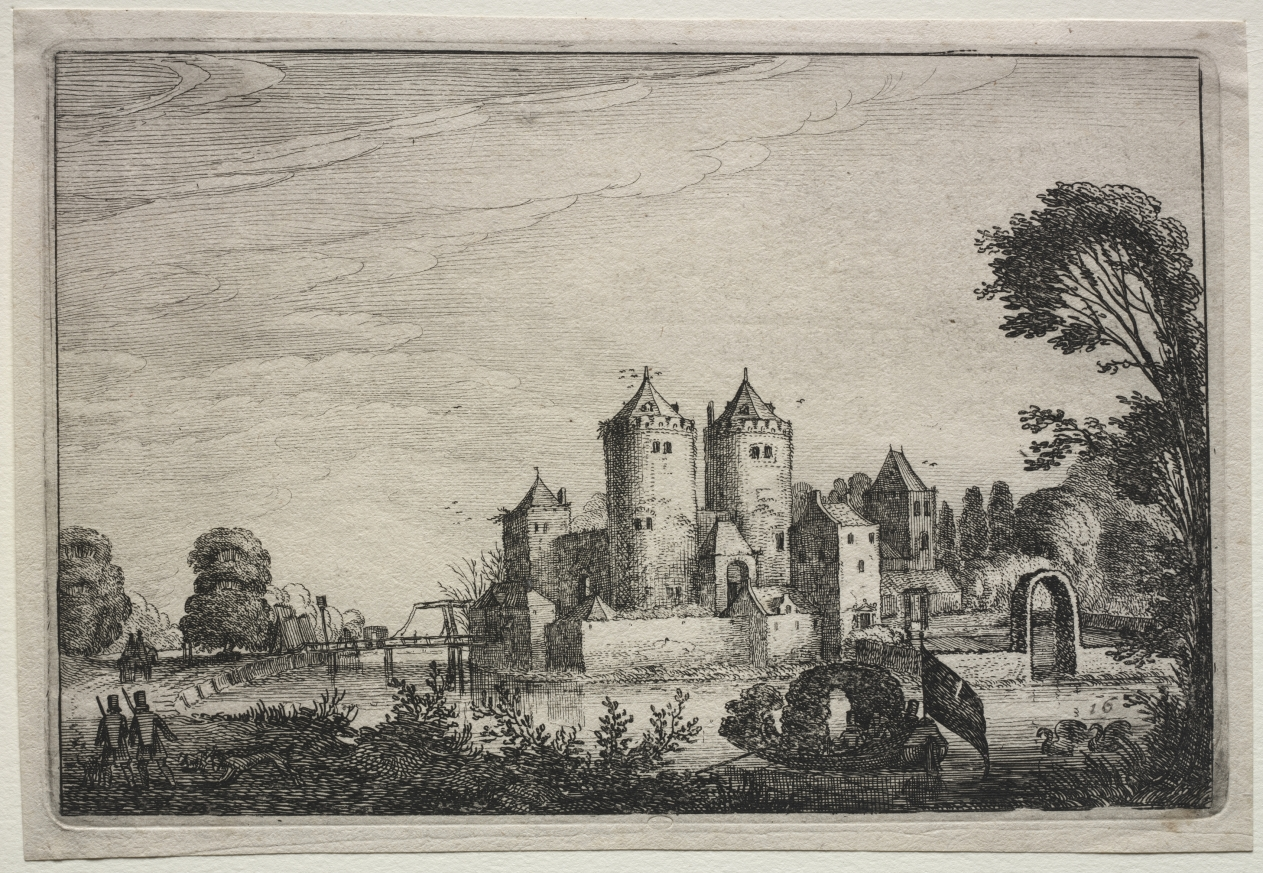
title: The Castle with Two Towers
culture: Netherlands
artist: Jan van de Velde (Dutch, 1620–1662)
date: 1616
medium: etching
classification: Print